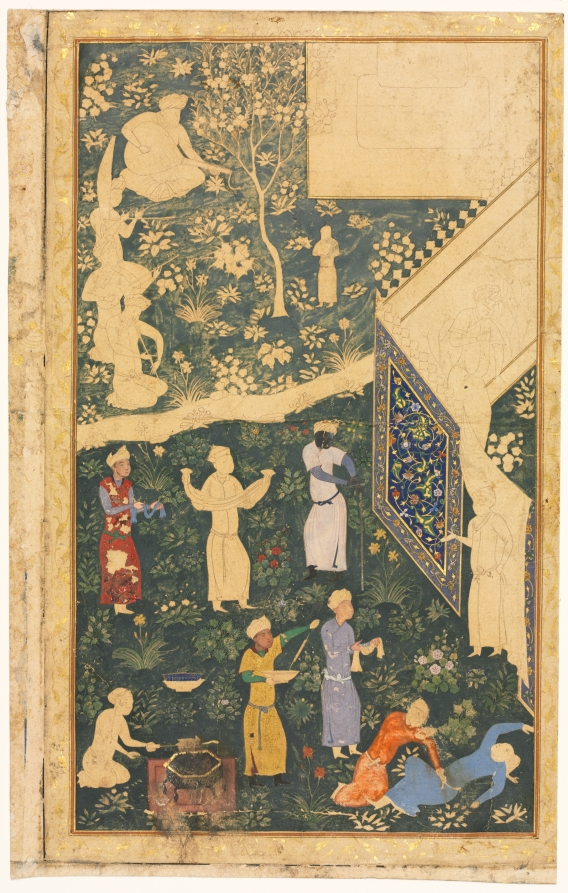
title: Left side of a double-page album folio: Outside a Royal Encampment (recto)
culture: Afghanistan or Iran, Timurid period (1370–1501)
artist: style of Bihzad (Iranian, active 1470–1506)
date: c. 1485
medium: opaque watercolor and gold on paper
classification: Manuscript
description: The painting is the left side of a double composition; at the upper left are musicians who provide ambient entertainment. A cook prepares meat over a brazier, while a servant brings kebab on a shallow bowl. The unfinished state of this painting reveals the artist's process of creating underdrawings that are filled with color. The verso has an example of calligraphy.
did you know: Intoxicated, a man in blue at the lower right has fallen.